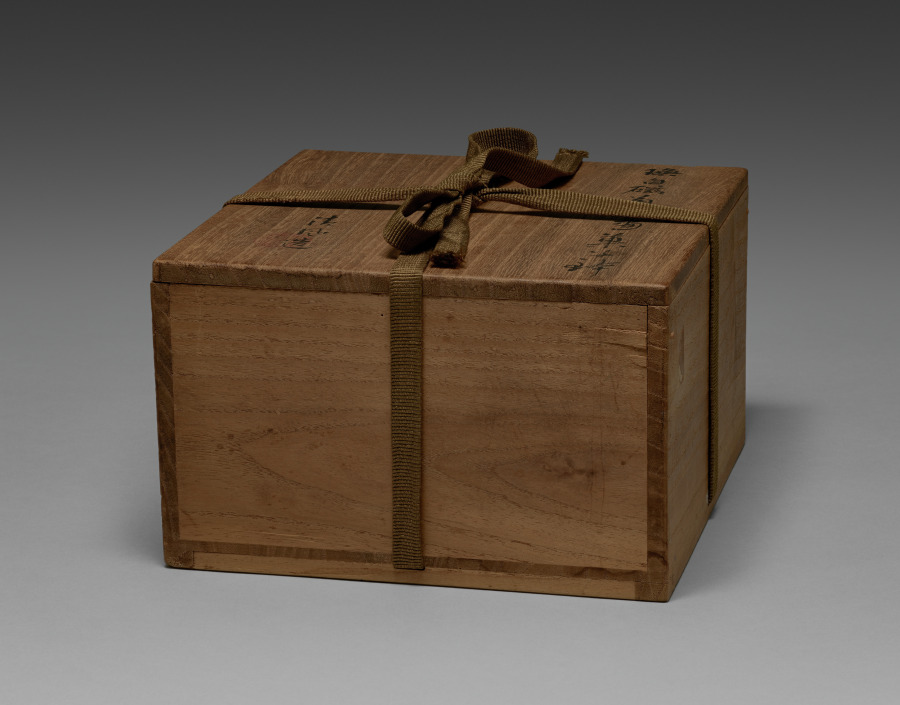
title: Sweets Bowl with Chrysanthemums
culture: Japan, Taishō period (1912–26) or Shōwa period (1926–89)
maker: Seifū Yohei IV (Japanese, 1872–1951)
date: 1914–46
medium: Porcelain with in-glaze and underglaze color and molded design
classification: Ceramic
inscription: 清風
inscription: 成山清風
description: Sweets bowls hold the confections enjoyed when drinking tea. This bowl and CMA 2022.207 offer an important lesson in appreciating Yohei IV’s ceramic practice, for while they have the same design and shape and are made with the same materials, the execution of the pieces makes them entirely different upon close inspection, thereby demonstrating the range of possible production results from a single template. Each bowl has the same composition of two different types of chrysanthemum flowers, one with long, slim, knifelike petals and the other with short, rounded, multilayered petals, shown running around its surface in low relief. The centers of the flowers are painted with yellow under the glaze. Yohei III formulated a number of new underglaze colors during his career, and this is likely one of them. The storage box lid provides abbreviated descriptions of the complex processes used in the surface decorations. It identifies the bowl inside as “Sweets dish with picture of chrysanthemum in kanpakuyū.” The box lid has on its exterior the seal reading “Seizan Seifu” 成山清風, which includes Yohei IV’s style name, but no signature. Instead, a signature is found on the interior of the box lid, accompanied by another seal, this time a gourd-shaped seal reading “Seifu.” The ink inscriptions are in a mode closer to formal script. This bowl, with the signature on the inside of the box lid, stands out for a distinctively bubble-filled glaze with a heavier pink effect, as well as more noticeable yellow at the flowers’ centers and deeper carving in the relief decoration. The design has crept much closer to the rim. A closer look at the delineation of the flower petals reveals that the designs differ at times with respect to which petals appear in front or behind others. The centers of the bases of both bowls are incised with “Seifu” in a manner matching many other works by Yohei IV, although there are slight differences. As one might expect from the other differences in the bowls, the characters on the base of the subtle bowl, CMA 2022.207, are gentler, finishing in a tapering out of the strokes. The strokes on this bold bowl end in triangular pinheads.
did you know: Here Yohei IV used his father’s kanpakuji formula, with underglaze pink for the gradated wash of color surrounding the flowers.